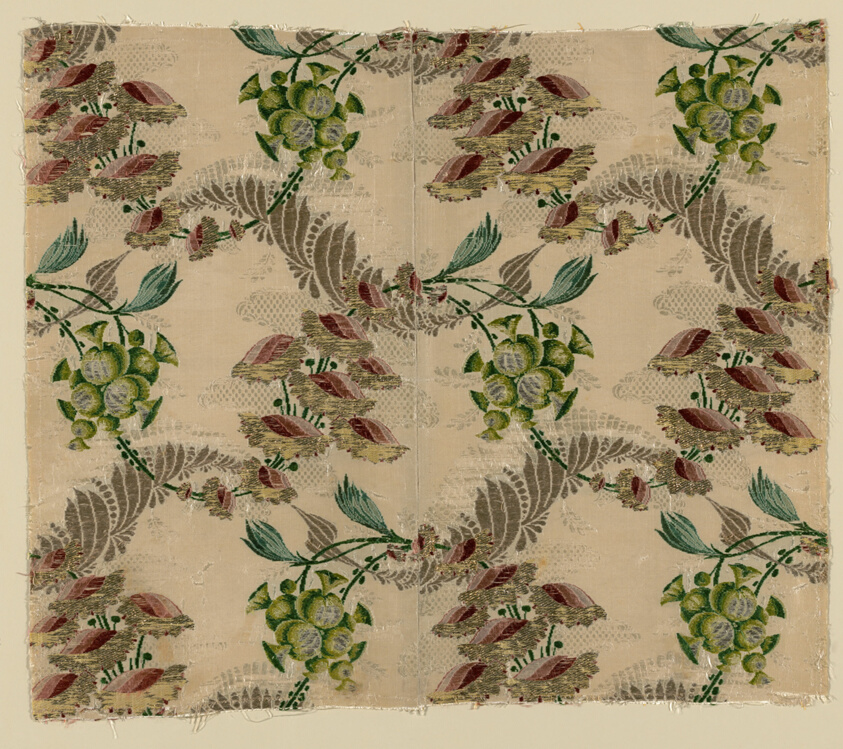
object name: Textile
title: Fragment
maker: France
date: 1725/75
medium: Silk, gilt-metal strips, and gilt- and silvered-metal-strip-wrapped silk, plain weave with supplementary brocading wefts and supplementary patterning wefts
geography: France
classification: textile; weaving